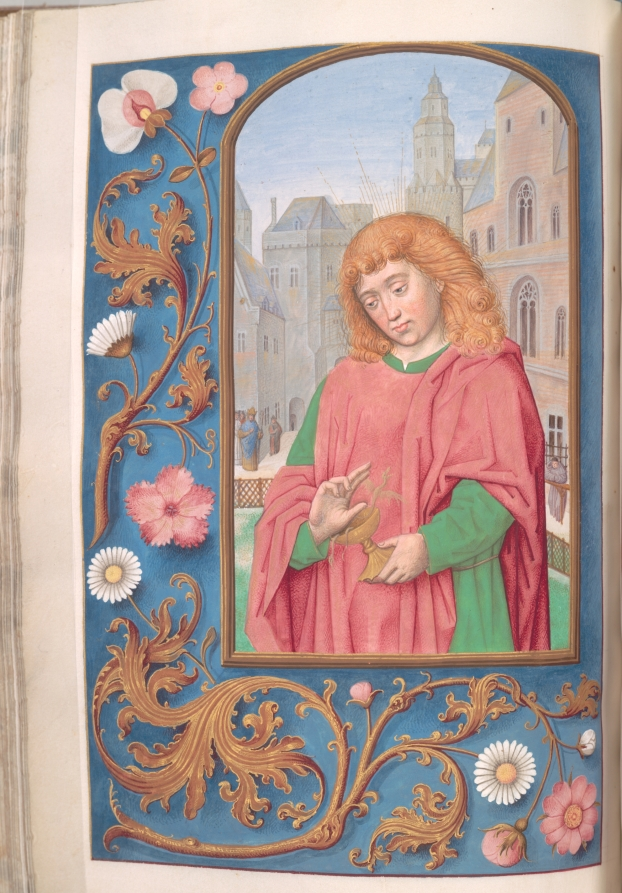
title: Hours of Queen Isabella the Catholic, Queen of Spain: Fol. 171, St. John the Evangelist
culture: Flanders, Ghent and Bruges, late 15th century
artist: Master of the First Prayerbook of Maximillian (Flemish, c. 1444–1519)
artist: and Associates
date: c. 1500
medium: ink, tempera, and gold on vellum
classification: Bound Volume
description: This manuscript was illuminated by a circle of at least five highly organized manuscript painters active in the Flemish cities of Ghent and Bruges. The principal illuminator was Alexander Bening, who painted the majority of the book's miniatures. Manuscripts produced by this circle of artists are renowned for the decoration of their borders, which typically feature a rich variety of realistically-painted flowers, birds, and butterflies. This prayer book, called a book of hours, was intended not for a cleric, but for the private devotions of a lay person-in this case, Isabella the Catholic, Queen of Spain (1451-1504). Isabella's coat of arms embellishes the book's frontispiece. It is unlikely that the book was commissioned by the Queen herself; rather, she probably received it as a diplomatic gift from someone courting her patronage, perhaps Cardinal Francisco Jimenez de Cisneros. A Franciscan friar, Jimenez was dependent upon Isabella for his advancement, first to the post of Queen's confessor in 1492, and then to Archbishop of Toledo in 1495.